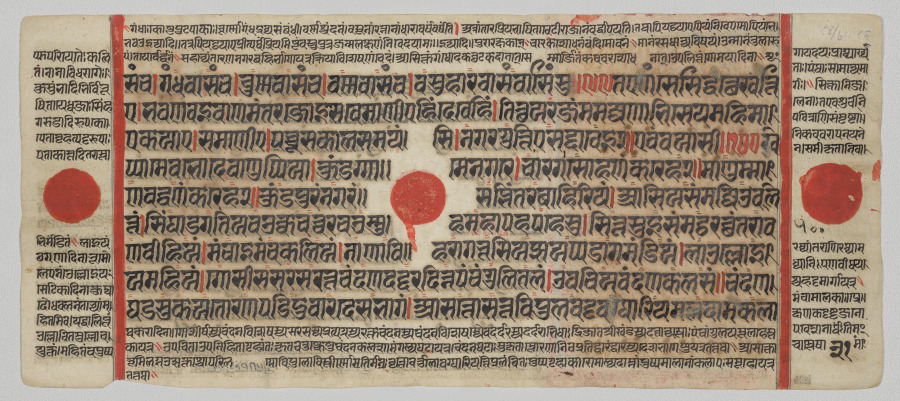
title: Text, Folio 31 (verso), from a Kalpa-sutra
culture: Western India, Gujarat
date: c. 1475–1500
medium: Gum tempera, ink, and gold on paper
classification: Painting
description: The large, seated figure in the center of the composition is Indra, king of the gods, who holds in his lap the infant Mahavira, founder of the Jain religion. Indra had taken him to Mount Meru, indicated by the jagged peaks at the bottom of the painting, for his first bath. Two priests flanking them hold vessels for the bath, and the two cows above indicate that the vessels are full of milk. The milk bath washed away all the impurities of the birth.